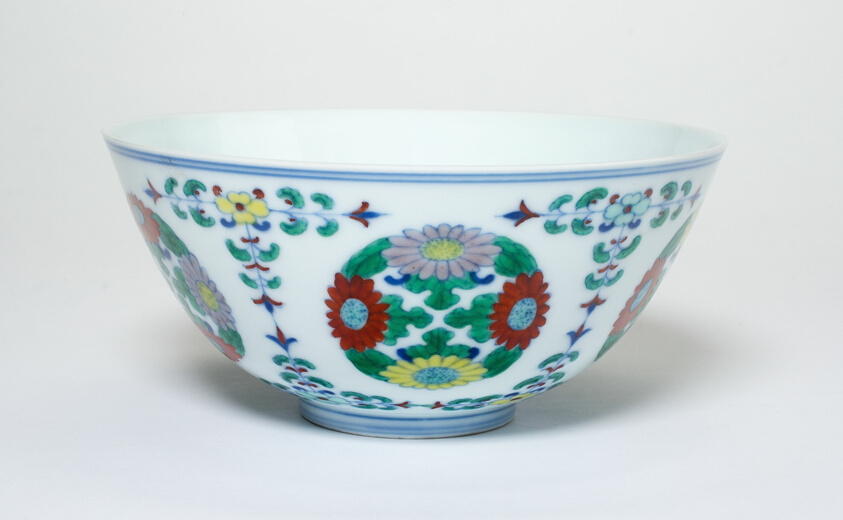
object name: Vessel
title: Bowl with Floral Medallions and Stems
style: Chinese (culture or style)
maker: China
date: Qing dynasty (1644–1911), Yongzheng reign mark and period (1723–1735)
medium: Porcelain painted in underglaze blue and overglaze enamels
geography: China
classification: bowl; porcelain; dish (vessel); ceramics; asian art; vessel